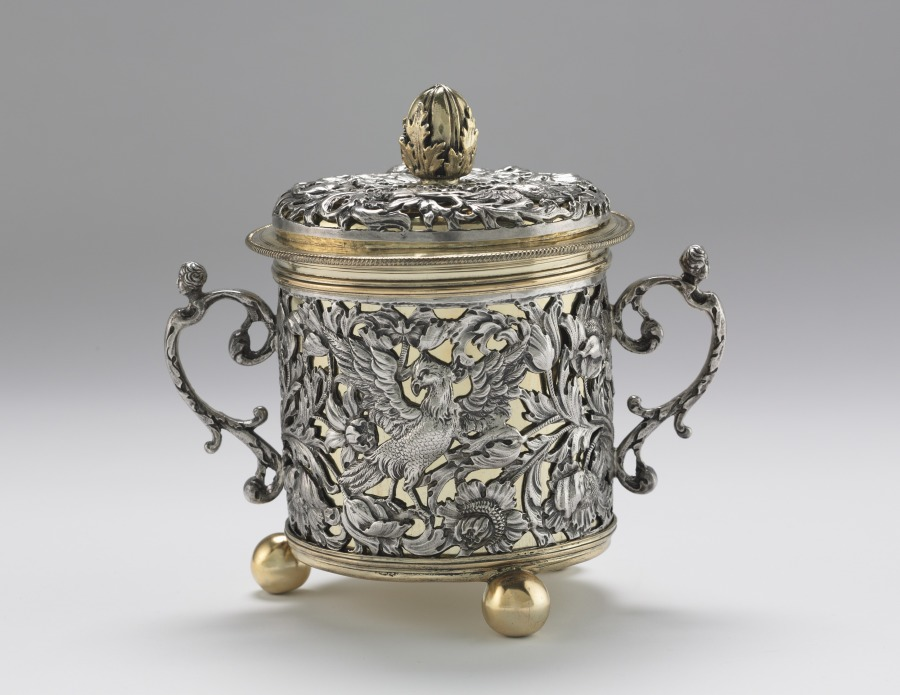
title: Two-Handled Cup and Cover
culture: England, London, 17th century (Charles II)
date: 1677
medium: silver and silver gilt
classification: Silver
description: Due to its size and ornament, this vessel may have functioned as a caudle cup, containing a mixture of ale or wine and bread, oatmeal, eggs, sugar, and spices that was given to women after childbirth to help them regain their strength. The scrolling foliage and exotic birds along the exterior of this cup were likely based on prints circulating in the 1600s. The reclining female figures capping the handles and the acanthus bud finial on the lid recall common architectural motifs.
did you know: Cups of this kind are often called sleeve cups since the ornament is incorporated into a pierced and chased hollow tube that slides over the gilded body of the cup.